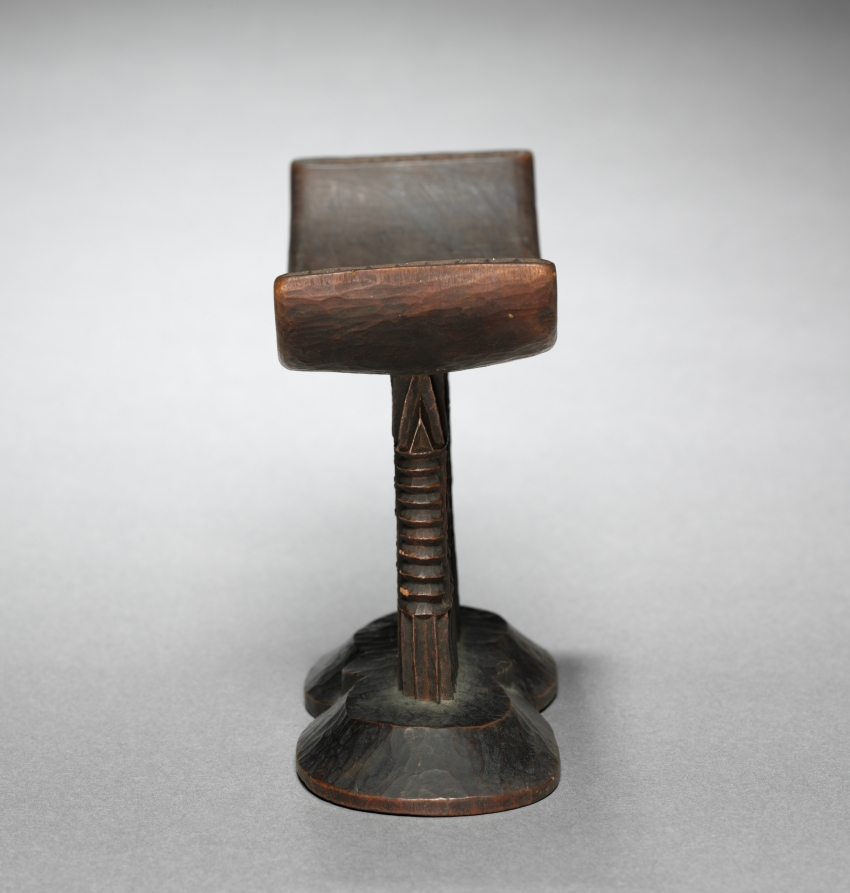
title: Headrest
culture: Southern Africa, Zimbabwe or Mozambique, Shona-style blacksmith-carver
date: c. 1910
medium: wood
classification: Furniture and woodwork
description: Headrests allowed Shona men to protect their elaborate braids. Placed under the neck or chin, frequent contact with hair and hairdressing products darkened its top. Tool marks show how it was smoothed only where the skin would make contact. Linked intimately to their owner, headrests often became burial goods or heirlooms. Recent research suggests Shona headrests symbolized women; small projections on the supports likely reference scarification marks worn by women of marrying age. As only mature men used headrests, it reinforces their female symbolism and women’s societal importance as wives.